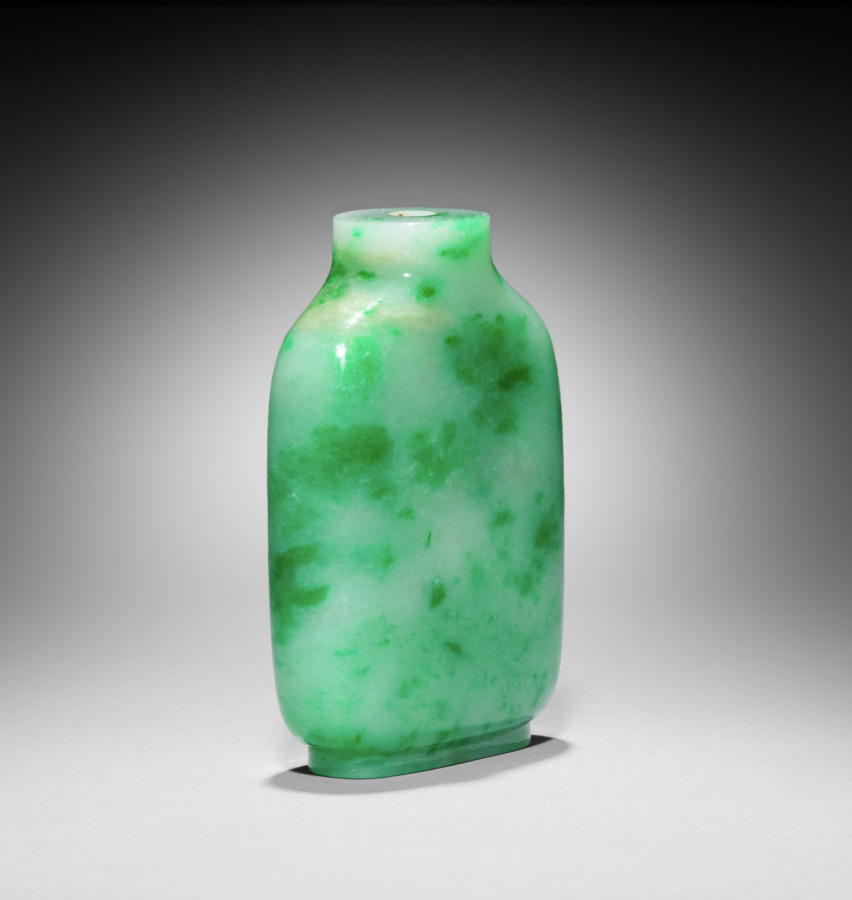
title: Snuff Bottle with Stopper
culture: China, Qing dynasty (1644-1911)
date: 1800s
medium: jade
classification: Jade